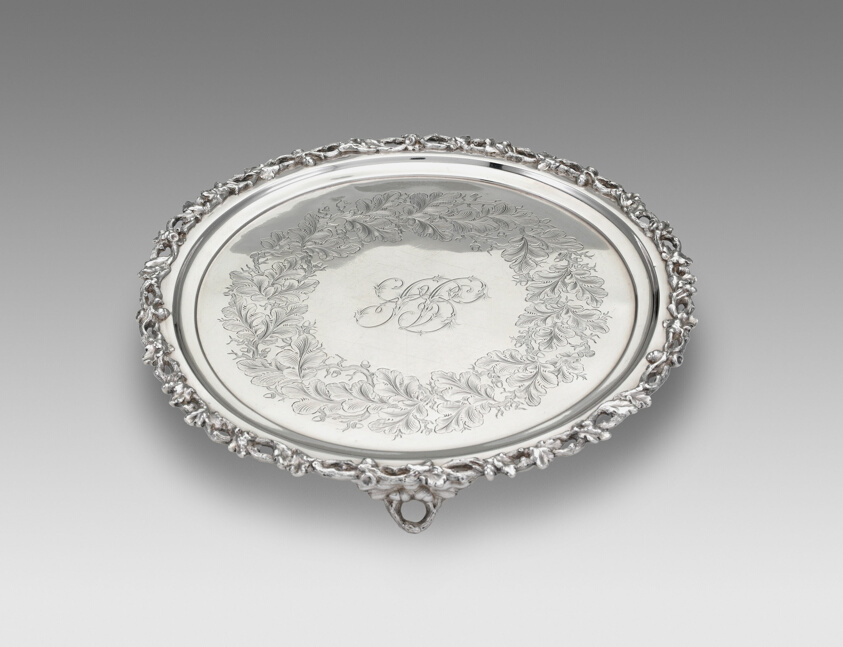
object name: Metalwork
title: Salver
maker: Haddock, Lincoln & Foss; American, 1859–68; Boston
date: c. 1850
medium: Silver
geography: Boston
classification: vessel for serving food; silver; american decorative arts; american arts; decorative arts